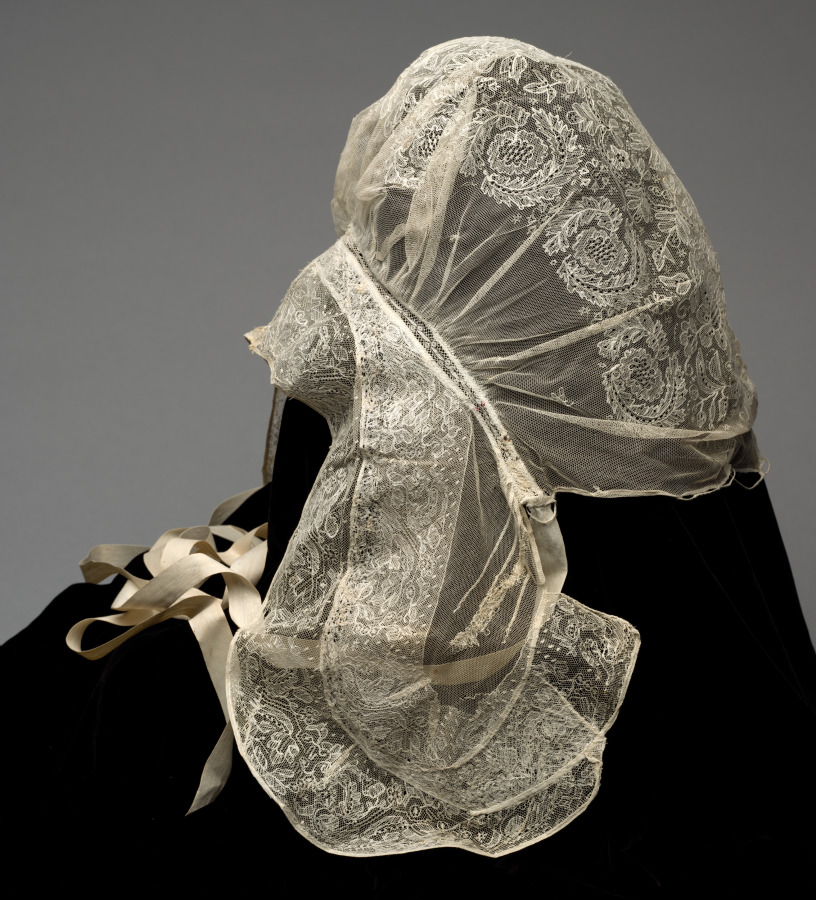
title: Lace Cap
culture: Netherlands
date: 1700s–early 1800s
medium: Lace net with embroidery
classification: Garment